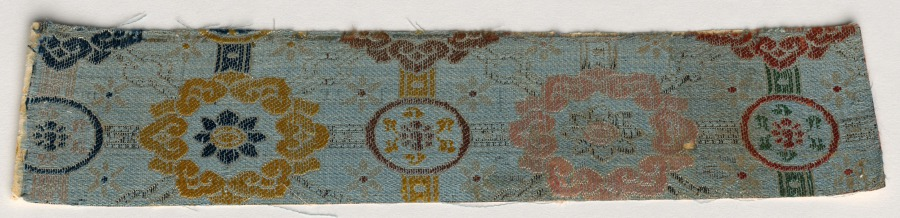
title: Textile Fragment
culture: Japan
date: 1800s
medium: silk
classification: Textile